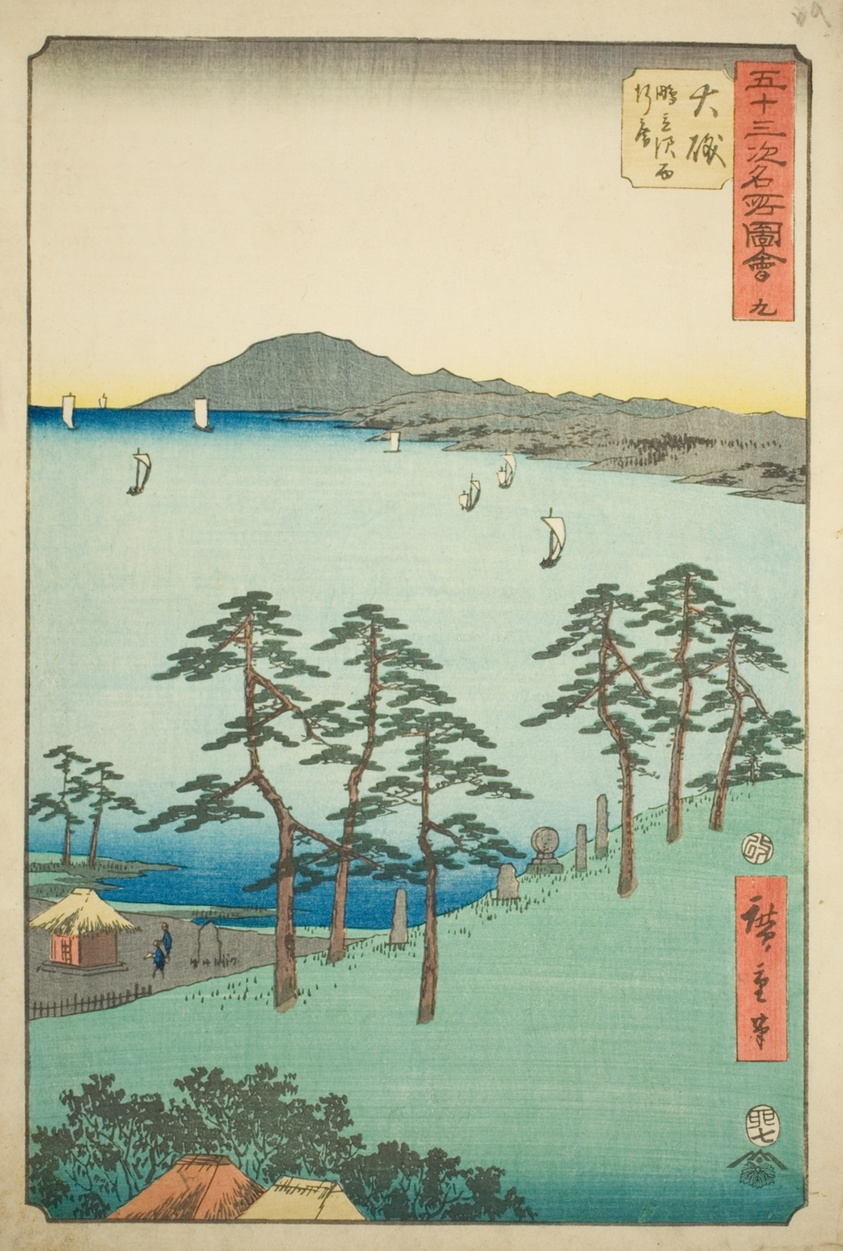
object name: Print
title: Oiso: Saigyo's Hut at Shigitatsu Marsh (Oiso, Shigitatsusawa Saigyoan), no. 9 from the series "Famous Sight of the Fifty-three Stations (Gojusan tsugi meisho zue)," also known as the Vertical Tokaido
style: Japanese (culture or style)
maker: Utagawa Hiroshige 歌川 広重; Japanese, 1797-1858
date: 1855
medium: Color woodblock print; oban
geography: Japan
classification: woodblock print; print; asian art